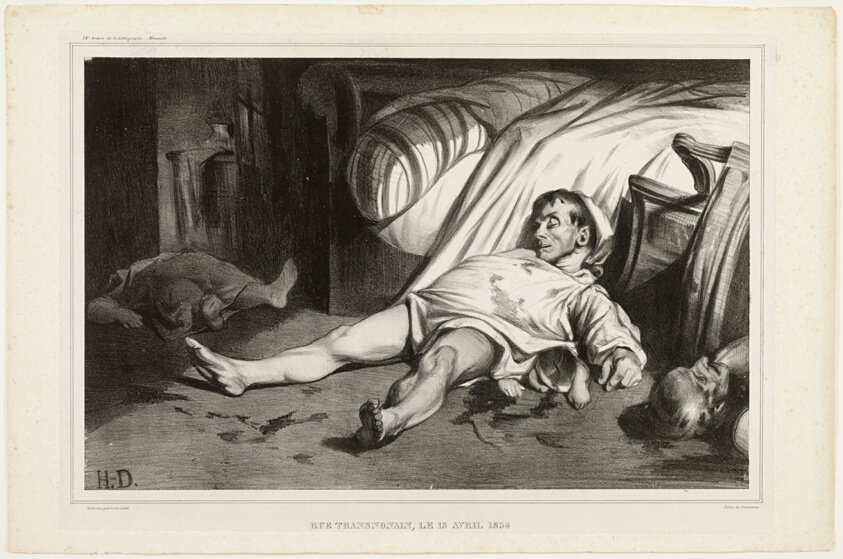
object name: Print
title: Rue Transnonain, on April 15, 1834, October 2, 1834, plate 24 from L’Association mensuelle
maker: Honoré Victorin Daumier; French, 1808-1879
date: October 2, 1834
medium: Lithograph in black on grayish-ivory China paper laid down on ivory wove paper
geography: France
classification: lithograph; print; prints and drawing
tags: interior